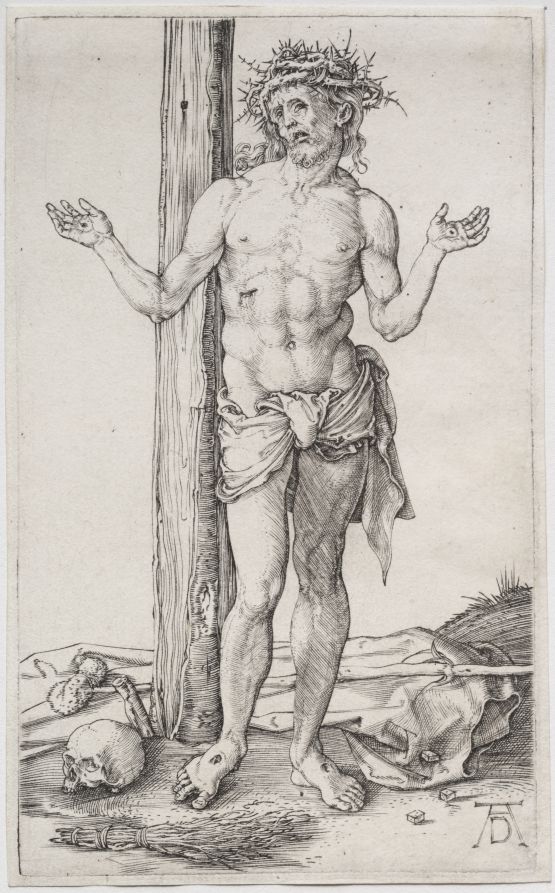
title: The Man of Sorrows Standing, with Hands Raised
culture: Germany, late 15th-early 16th Century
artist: Albrecht Dürer (German, 1471–1528)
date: c. 1500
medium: engraving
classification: Print